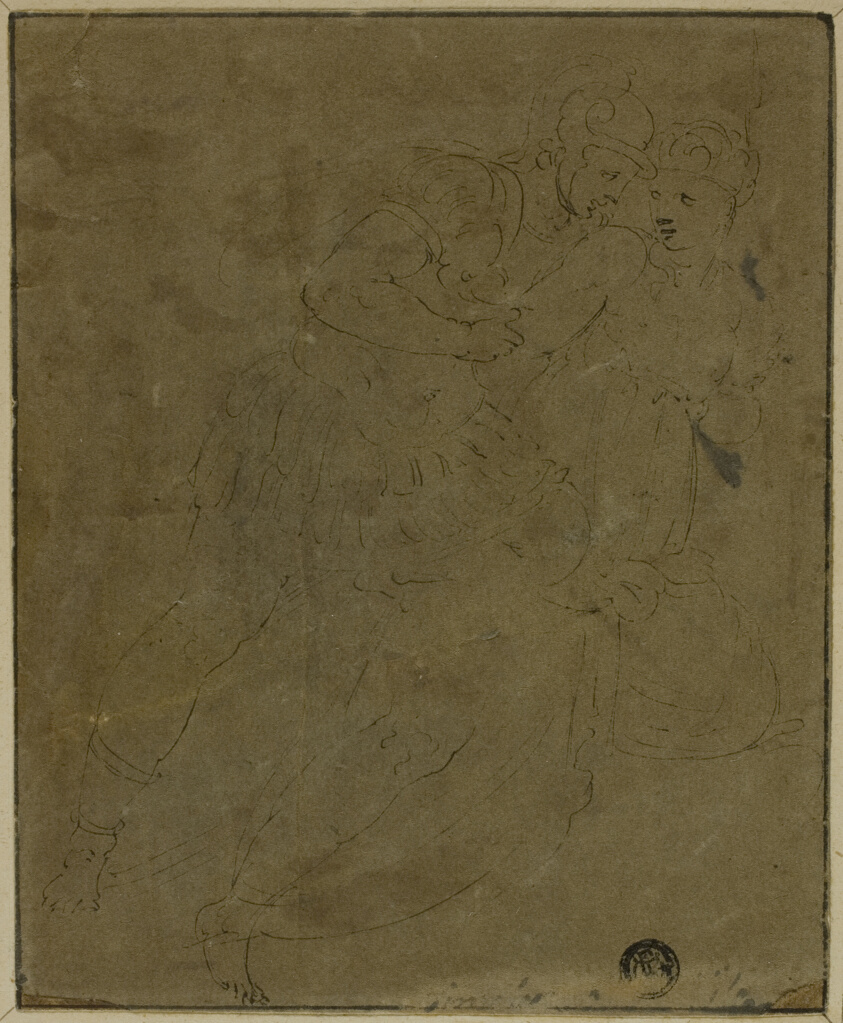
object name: Drawing and Watercolor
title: After the Antique: Greek and Amazon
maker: Battista Franco, called Il Semolei; Italian, c. 1510-1561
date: 1530/36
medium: Pen and brown ink on gray-brown laid paper, laid down on tan laid paper, edge mounted on cream wove paper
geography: Italy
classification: pen and ink drawings; drawings (visual works); prints and drawing